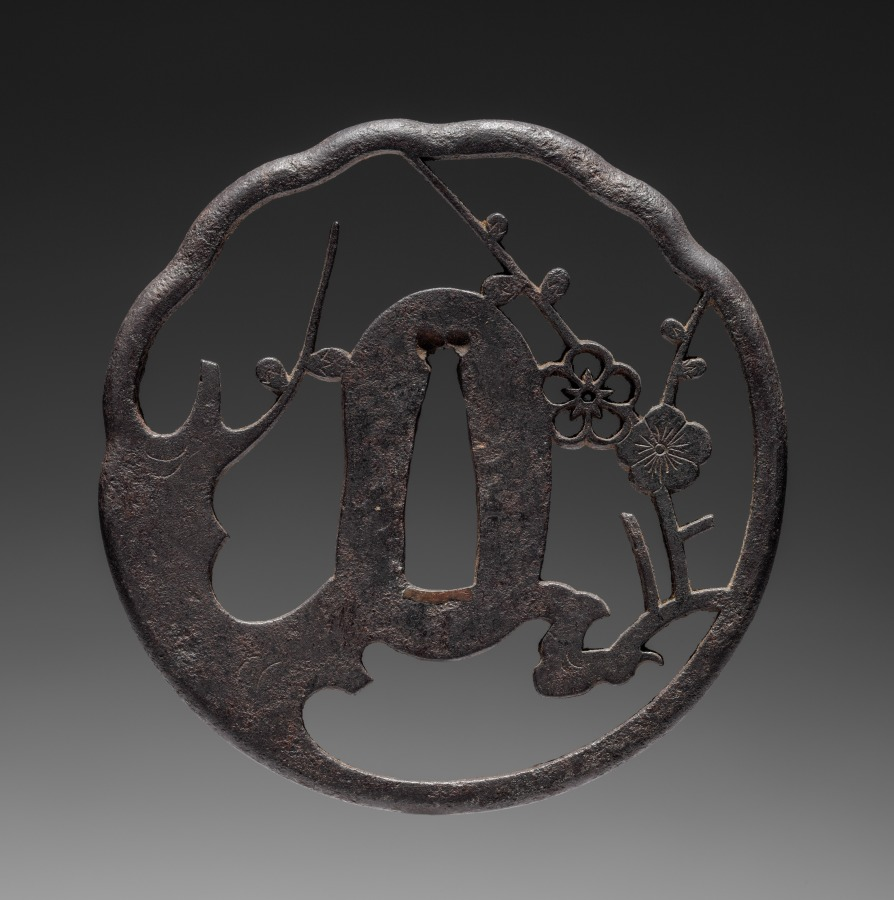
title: Sword Guard (Tsuba) with Plum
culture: Japan, Edo period (1615–1868)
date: 1615–1868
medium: iron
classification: Arms and Armor